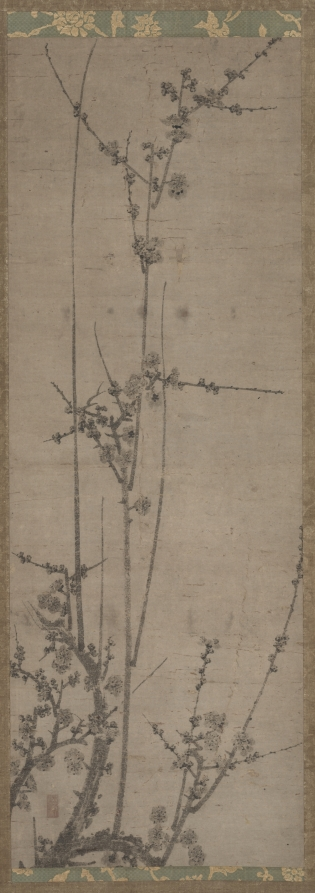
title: Plum Blossoms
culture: Japan, Nanbokuchō period (1336–92)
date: 1336–92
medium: hanging scroll; ink on paper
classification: Painting